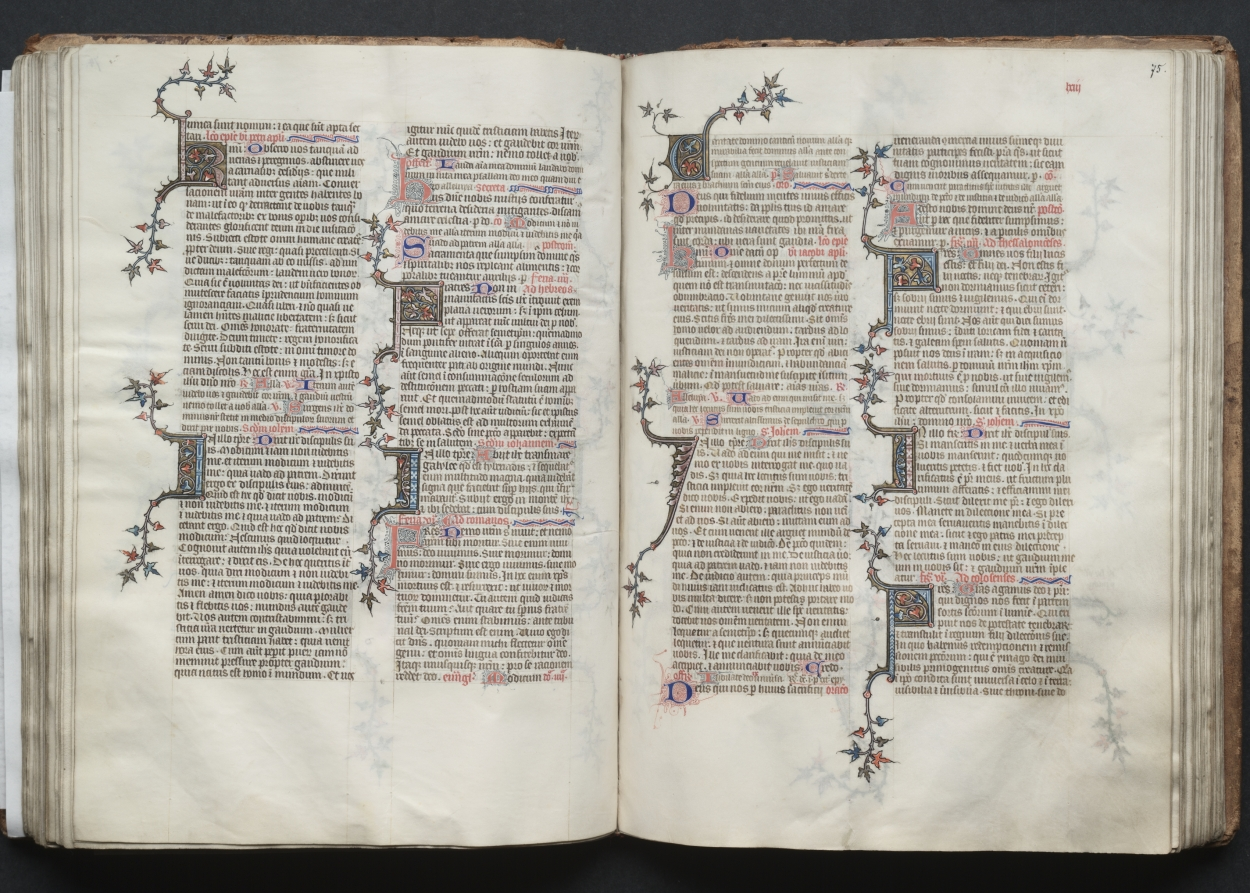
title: The Gotha Missal: Fol. 75r, Text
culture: France, Paris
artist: Master of the Boqueteaux (French)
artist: and Workshop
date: c. 1375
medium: ink, tempera, and gold on vellum; blind-tooled leather binding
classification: Bound Volume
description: The style and quality of this manuscript's decoration is typical of deluxe Parisian books made for aristocratic or royal patrons. Most of the book's decoration appears to be the work of the Master of the Boqueteaux, an artist active at the court of King Charles V (died 1380). His style was apparently shared by a number of book illuminators working in and around Paris. It is very possible that the Gotha Missal belonged to Charles V, but is not provable because the manuscript has no royal portraits and lacks a colophon. Given the book's magnificent decoration, however, it would seem that it was produced for a Valois prince, if not for the king himself. The manuscript receives its name from the German dukes of Gotha, its later owners.